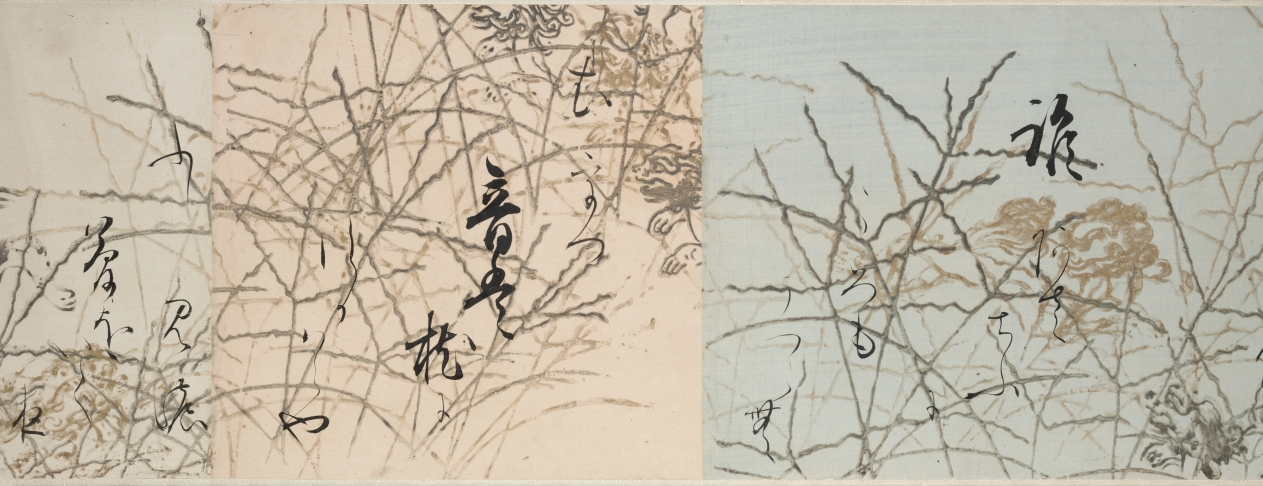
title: Selections from the New Collection of Japanese Poems from Ancient and Modern Times (Shinkokin wakashū) with Printed Designs of Chinese Lions and Crab Finger Grass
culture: Japan, Edo period (1615–1868)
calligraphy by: Hon'ami Kōetsu (Japanese, 1558–1637)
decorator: Tawaraya Sōtatsu (Japanese, c. 1570–c. 1640)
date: early 1600s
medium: handscroll; ink, gold, and silver on paper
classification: Calligraphy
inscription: Seal: 光悦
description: Hon’ami Kōetsu was a calligrapher and craftsman who frequently collaborated with the painter Tawaraya Sōtatsu, considered the first master of the Rinpa school. Kōetsu brushed seven poems from the autumn section of a poetry anthology onto dyed paper with motifs designed and printed in gold and silver by Sōtatsu.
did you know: Before becoming a master painter of screens, Tawaraya Sōtatsu painted fans.